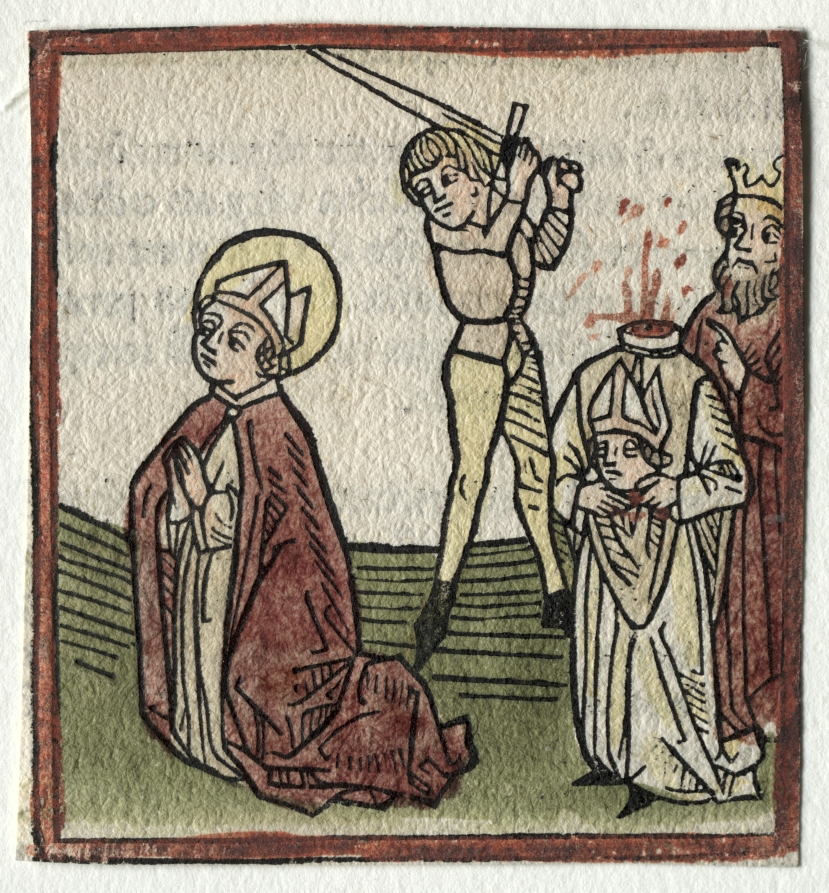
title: Sts. Theonestus and Albanus; or St. Pancrace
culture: Germany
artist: Günther Zainer (German, d. 1478)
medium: woodcut with hand coloring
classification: Print